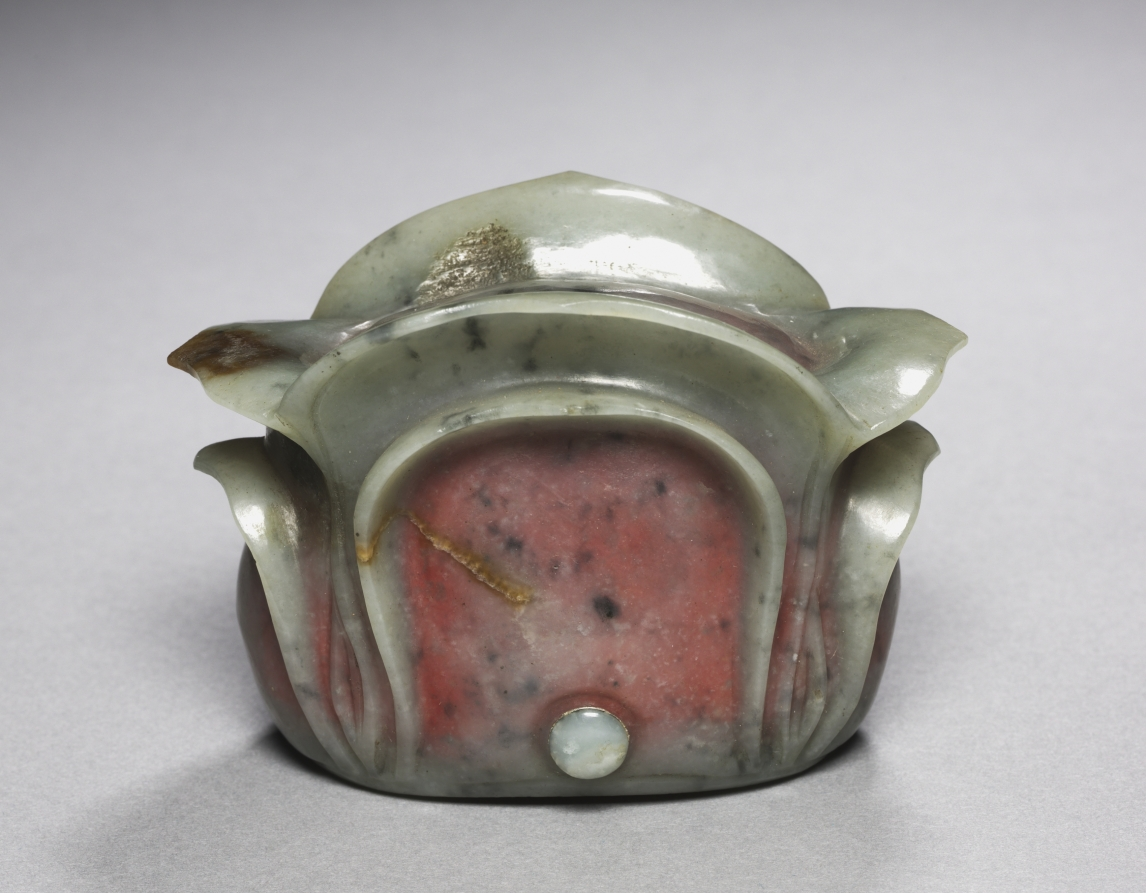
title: Daoist Cap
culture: China, Song dynasty (960-1279) - Yuan dynasty (1271-1368)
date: 960–1279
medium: grayish-green jade with brown and black markings; interior with pink pigment and gold inlays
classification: Jade